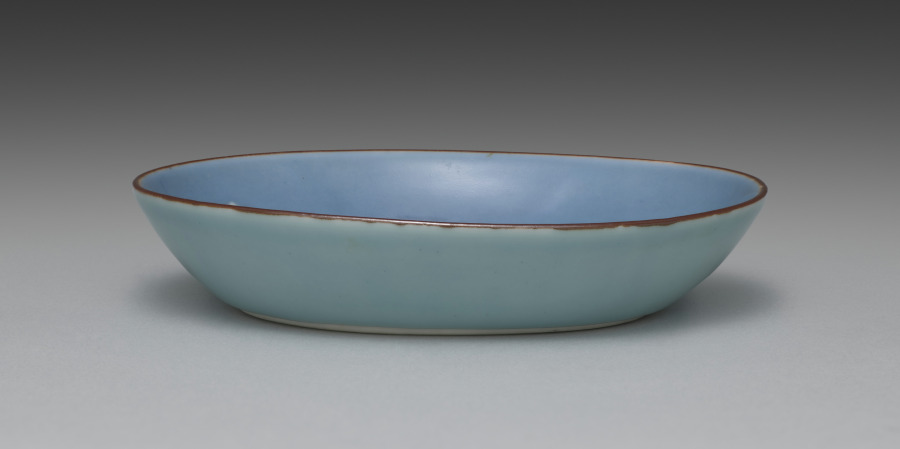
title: Dish from Dishes with Shells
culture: Japan, Meiji period (1868–1912) or Taishō period (1912–26)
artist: Seifū Yohei IV (Japanese, 1872–1951)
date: 1914–46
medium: One from a set of five dishes; porcelain with blue glaze, iron oxide, and molded design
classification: Ceramic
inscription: 清風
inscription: 清風造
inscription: 清風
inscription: 成山清風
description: Yohei IV chose an aquatic theme for this set of five mukōzuke, side dishes. He added an iron oxide rim and used a concentrated blue glaze on both the interior and exterior. The glaze, named on the box lid, is his father’s “evening moon” (tsukiyoi) color. The conch in relief takes up the entire bottom of the dish. Up the sides are two snails on one end and on the other a scallop. This results in a boldly graphic, less realistic effect.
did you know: This set of dishes, mukōzuke, could be used for serving small side dishes at a tea gathering.